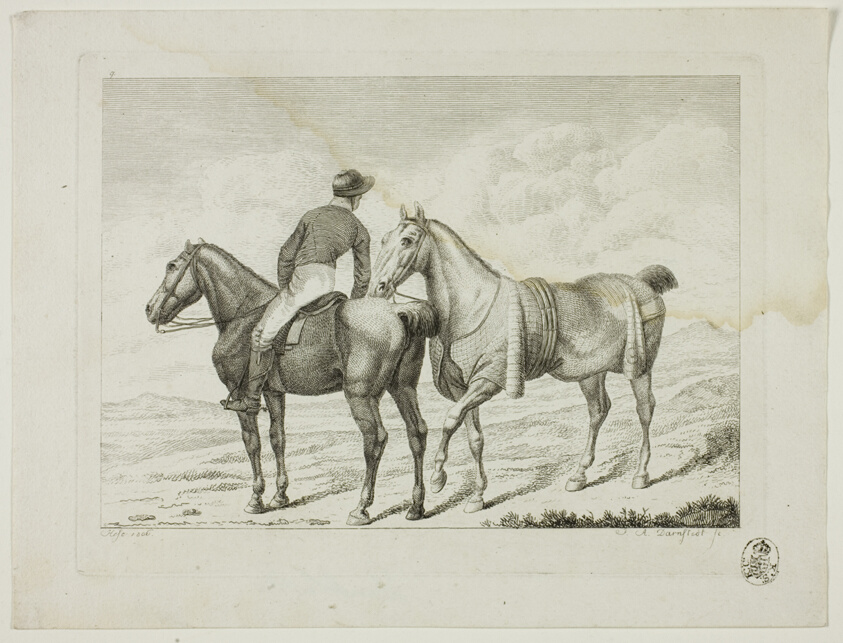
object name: Print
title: Riding School and Horses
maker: Johann Adolph Darnstedt (German, 1769-1844)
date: 1806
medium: Etching on ivory wove paper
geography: Germany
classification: etching; prints and drawing; print